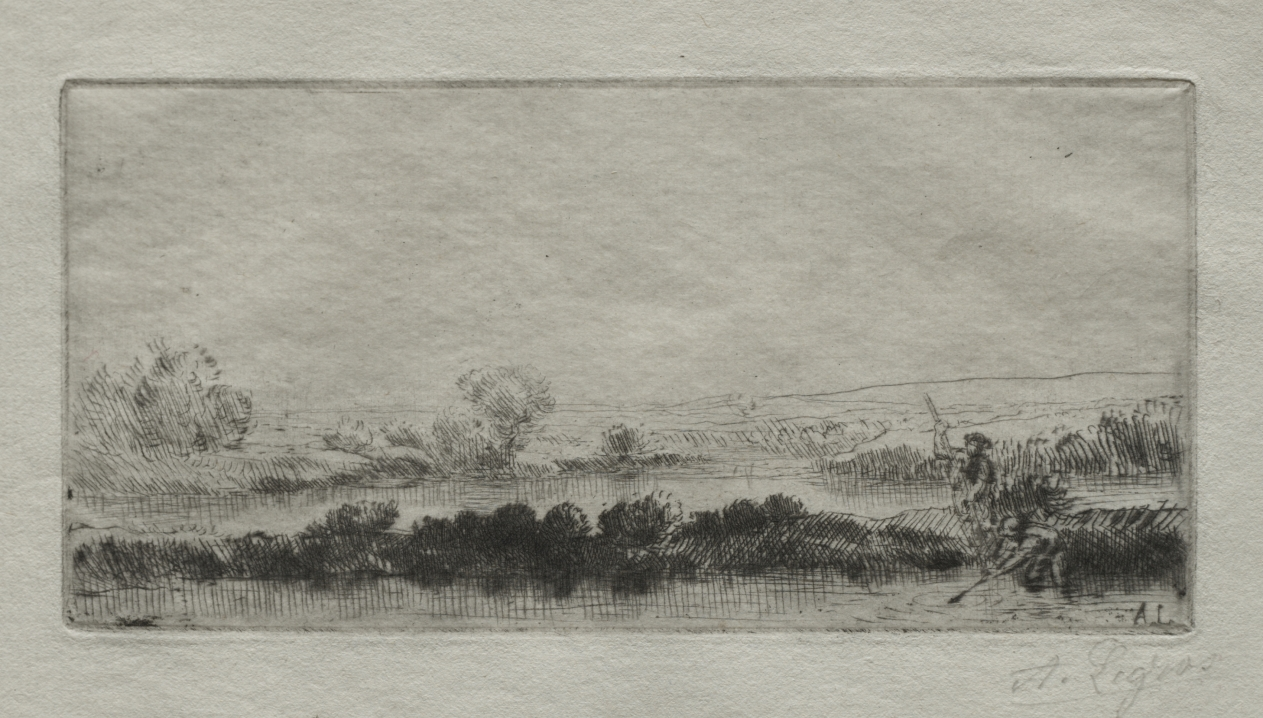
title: Landscape with Peat-bog: In the Marsh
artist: Alphonse Legros (French, 1837–1911)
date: c. 1877–90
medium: drypoint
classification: Print